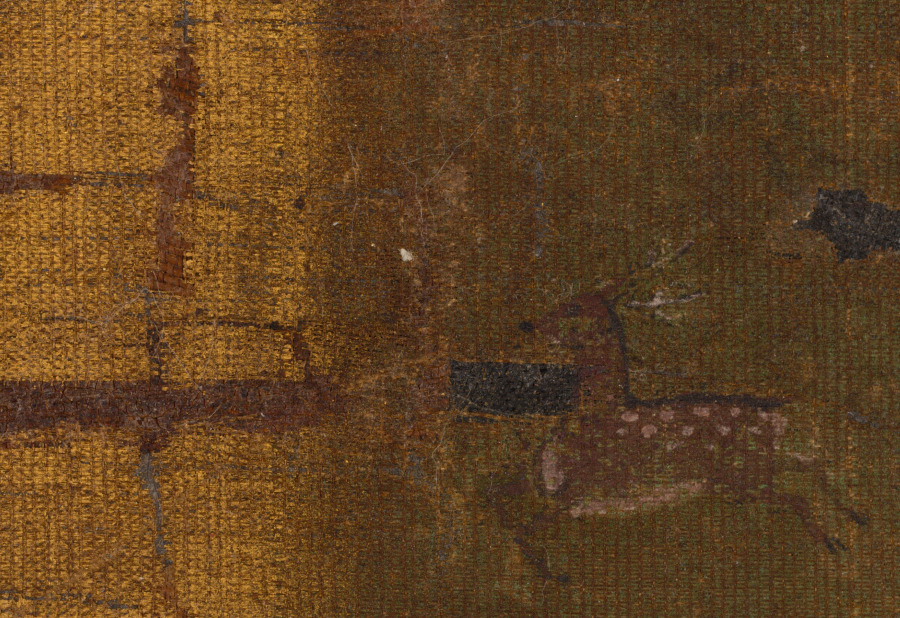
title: Kasuga Shrine Mandala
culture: Japan, Kamakura period (1185–1333)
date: early 1300s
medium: Hanging scroll; ink, color, and gold on silk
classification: Painting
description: A golden path beginning at the bottom of this painting leads up to four red-and-white buildings to the left, then to a fifth building on the right. These are the five shrine halls of Kasuga Taisha in Nara. Above and beyond the buildings is a sacred mountain range––with Mount Mikasa at center, Mount Wakakusa in gold to the left, and the sun or moon rising up behind the mountains. Sacred deer appear here and there. Five figures representing the original Buddhist forms of the five kami of the shrine complex stand on clouds above the mountains.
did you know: Sacred deer, the vehicles of the Kasuga deities, move about the shrine compound.